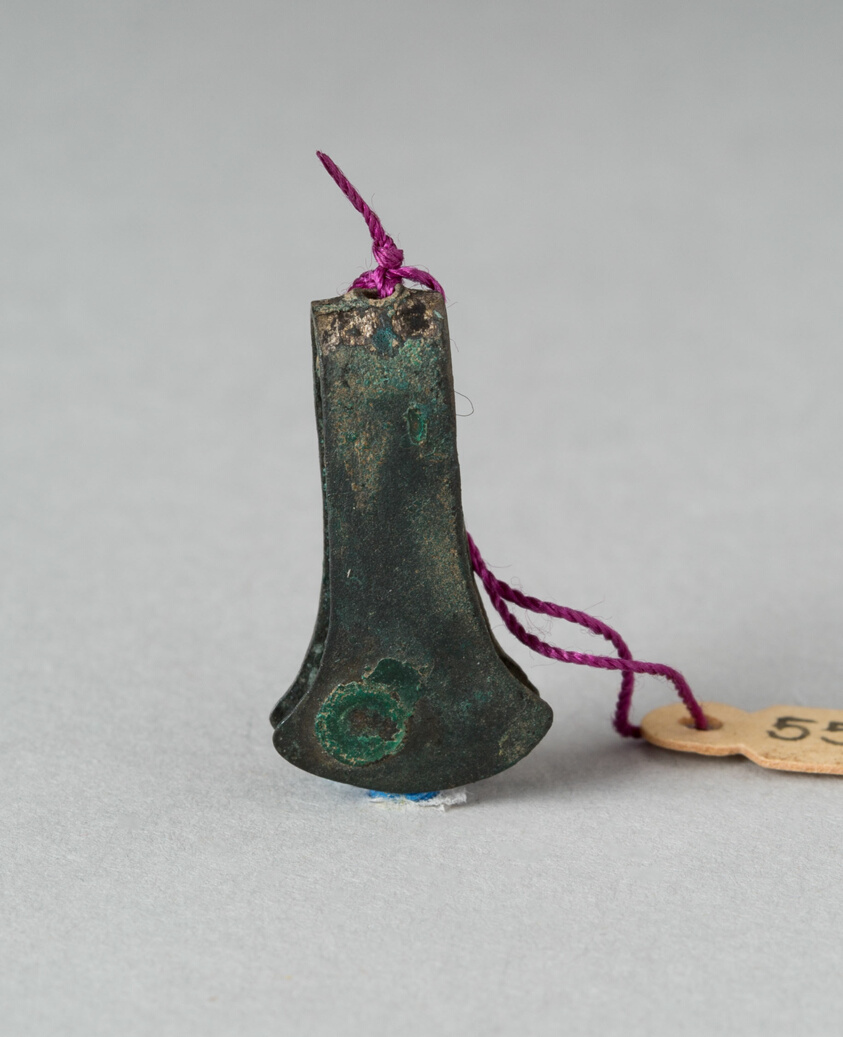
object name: Decorative Arts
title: Celt-shaped Tweezers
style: chimú, Arts of the Americas, andean, andes, peruvian, south american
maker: Probably Chimú; North coast, Peru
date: Probably 1000–1400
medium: Copper alloy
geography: Peru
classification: metal; american decorative arts; utensil; decorative arts; art of the americas